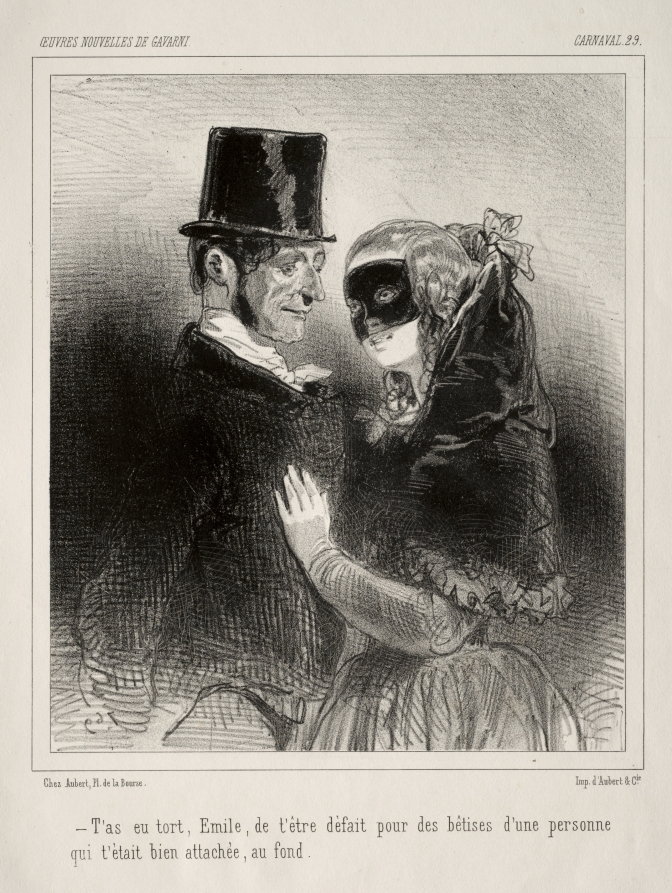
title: Carnaval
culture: France, 19th century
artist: Paul Gavarni (French, 1804–1866)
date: c. 1841–47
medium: lithograph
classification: Print